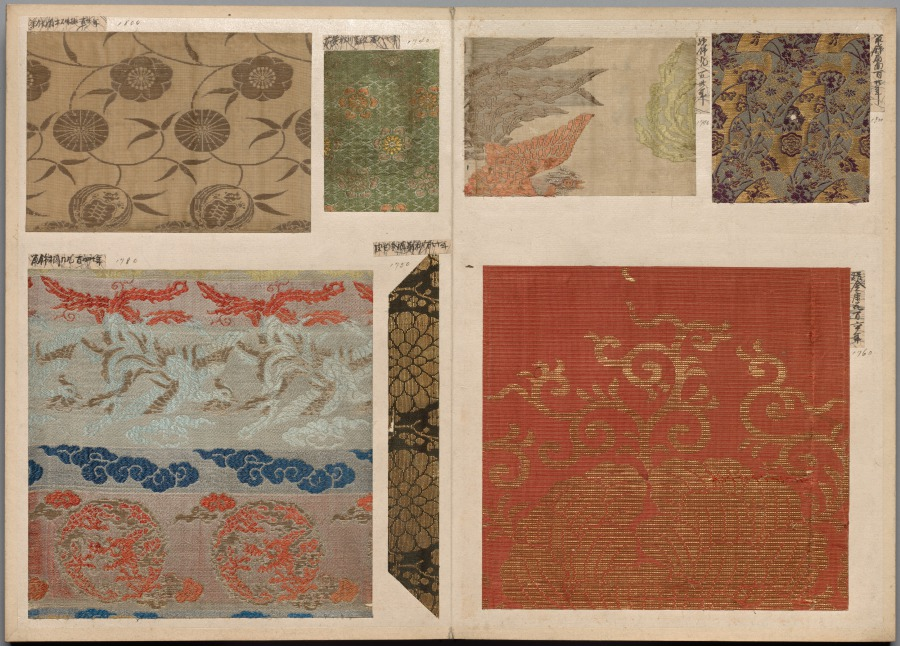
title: Album of Textile Samples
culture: Japan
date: 1790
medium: silk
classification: Textile